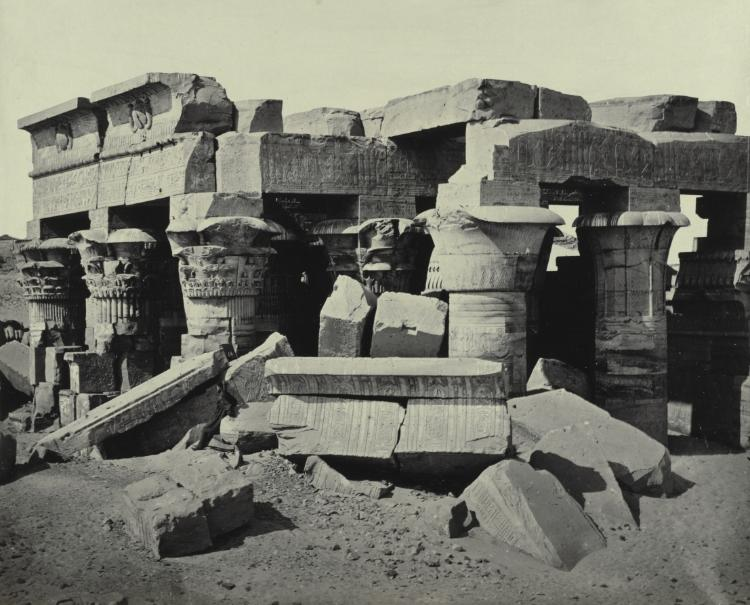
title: Kom Ombo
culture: England, 19th century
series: Egypt, Sinai and Jerusalem: A Series of Twenty Photographic Views, with Descriptions by Mrs. Poole and Reginald Stuart Poole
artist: Francis Frith (British, 1822–1898)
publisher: William Mackenzie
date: c. 1858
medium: albumen print from wet collodion negative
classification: Photograph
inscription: Written in pencil on verso of mount: "42 [circled]"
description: Frith often emulated the drawings of David Roberts in selecting monuments to illustrate and positions from which to shoot. Both artists encountered the temple at Kom Ombo still more than halfway buried in sand. “It reminds you of some grand old giant, buried to the shoulders,” wrote Frith, “not dead yet, but overpowered and imprisoned by some potent spell—majestic in his helplessness.” In his photographs, however, Frith cared less about emotional impact and more about the accuracy of his depictions. “A truthful record is of more value than the most elaborately beautiful picture,” he proclaimed.